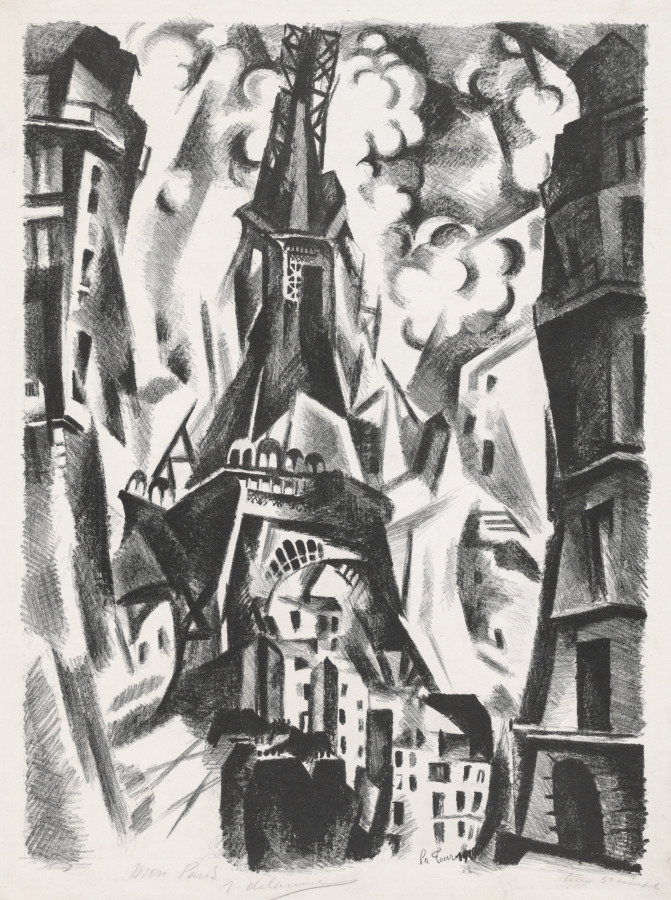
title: La Tour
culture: France, 20th century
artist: Robert Delaunay (French, 1885–1941)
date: 1926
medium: lithograph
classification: Print